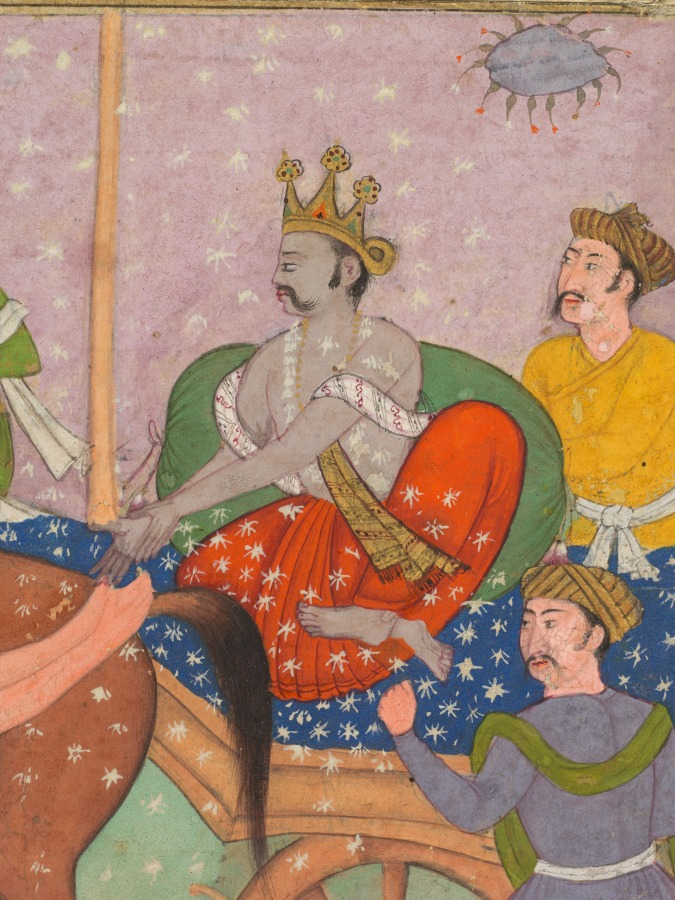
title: A charioteer riding through a rocky landscape with an entourage of footmen and musicians, page from a Razm-nama (Book of Wars) adapted from the Sanskrit Mahabharata and translated into Persian by Mir Ghiyath al-Din Ali Qazvini, known as Naqib Khan (Persian, d. 1614)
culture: India, Mughal, 17th century; made for Abd al-Rahim the Khan Khanan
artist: attributed to Yusuf Ali (Indian, active early 1600s)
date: 1616–17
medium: Gum tempera, ink, and gold on paper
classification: Painting